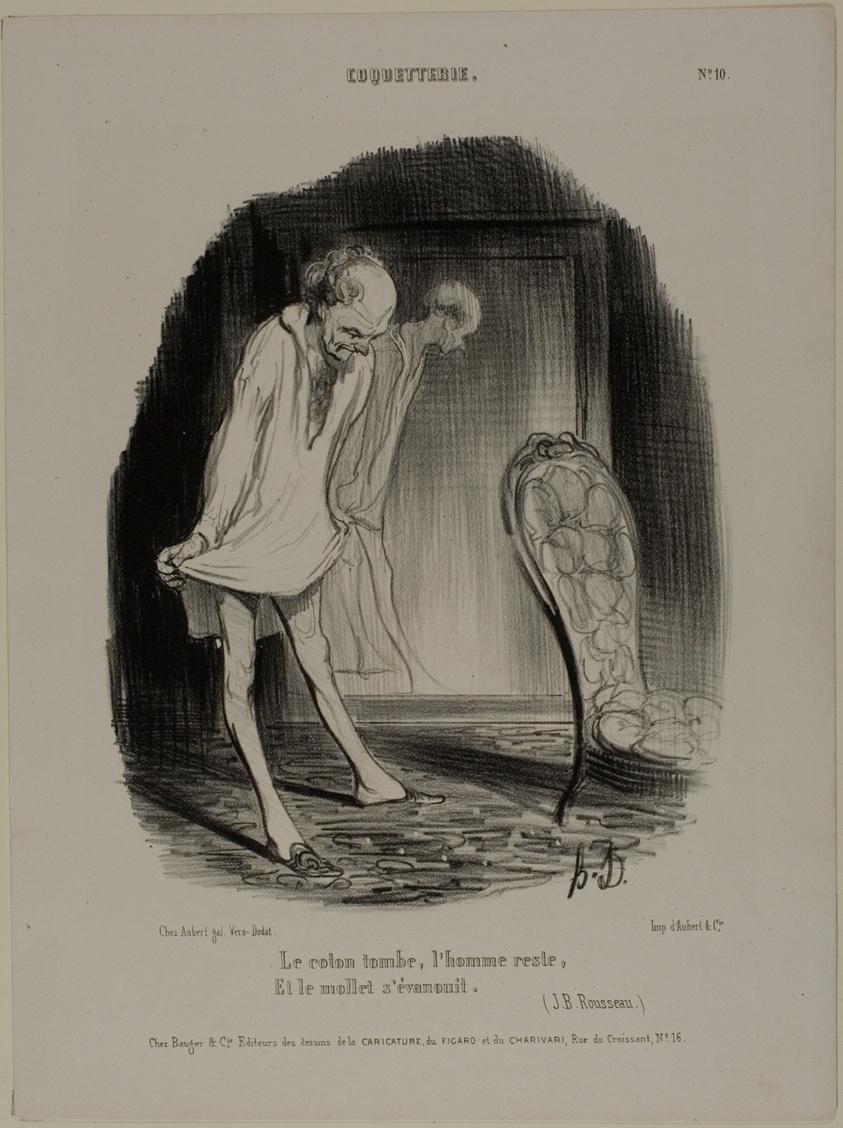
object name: Print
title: The Cotton Gown Falls, Man Remains, and the Calf Fades (J.B. Rousseau), plate 10 from Coquetterie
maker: Honoré Victorin Daumier; French, 1808-1879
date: 1840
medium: Lithograph in black on off-white wove paper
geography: France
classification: lithograph; print; prints and drawing